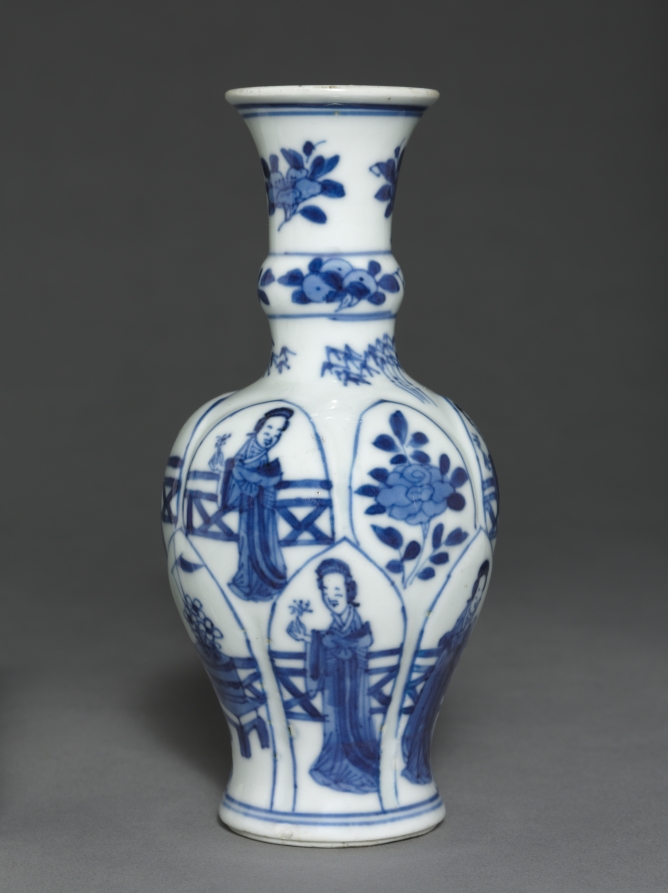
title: Vase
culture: China, Qing dynasty (1644-1911)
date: 19th Century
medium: porcelain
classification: Ceramic